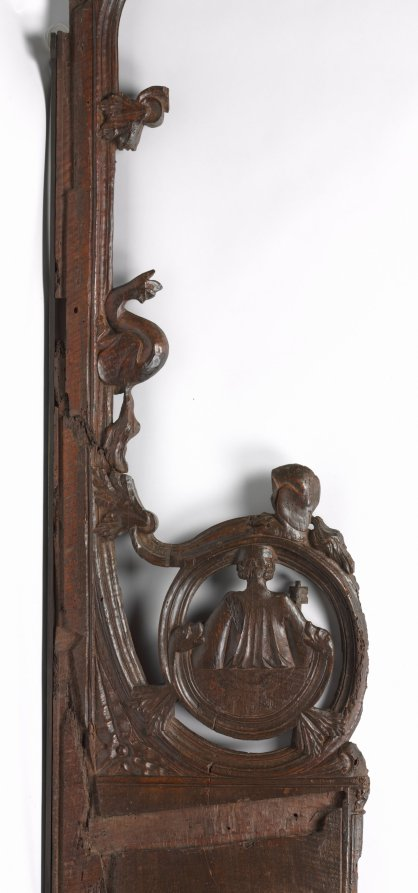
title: Panel from a Choir Stall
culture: Spain, Catalonia, Monastery of Pedralbes, 14th century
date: c. 1330–1340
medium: walnut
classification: Furniture and woodwork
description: The large panel shown here was probably the end panel of a stall that faced another across the choir of a Gothic church. The panel depicts a seated pope, possibly Urban IV, who holds the keys of St. Peter and a book.